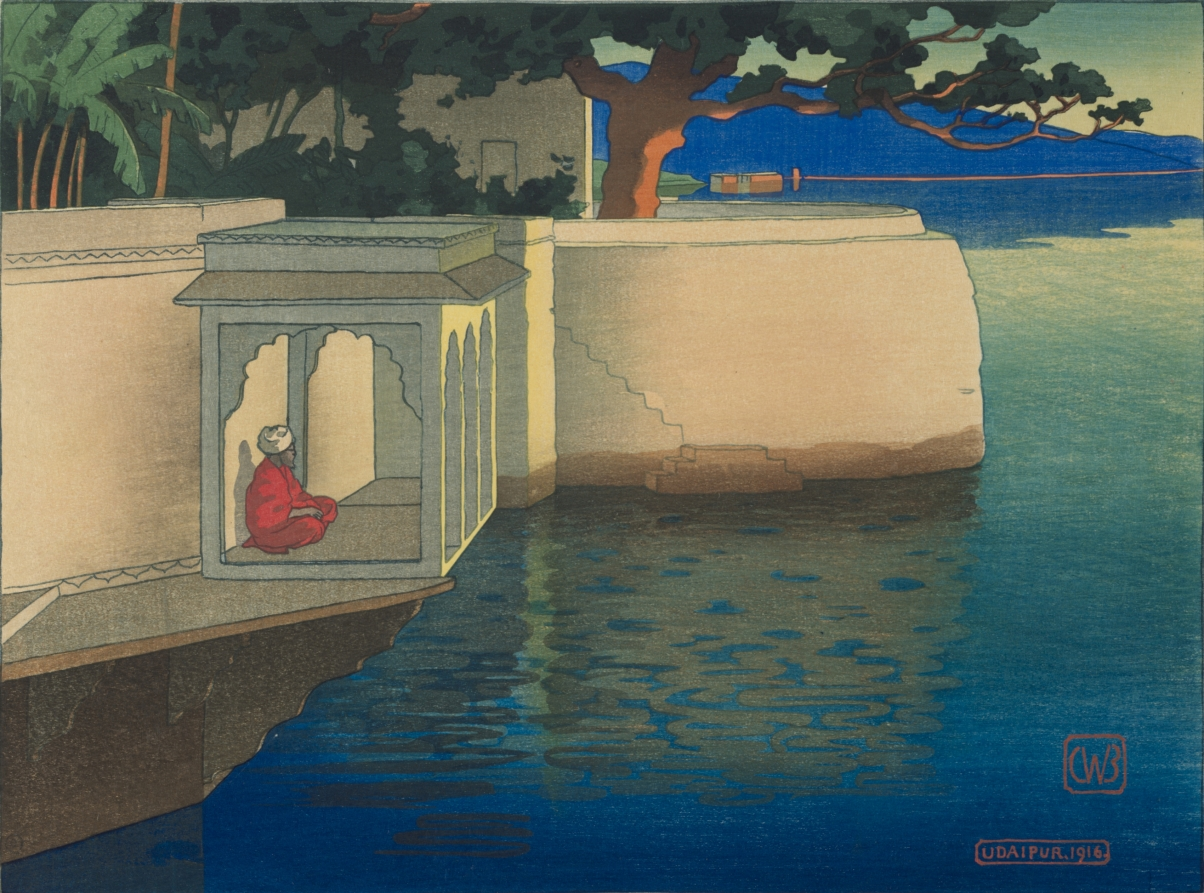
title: Udaipur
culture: England, 20th century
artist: Charles William Bartlett (British, 1860–1940)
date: 1916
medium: color woodcut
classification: Print